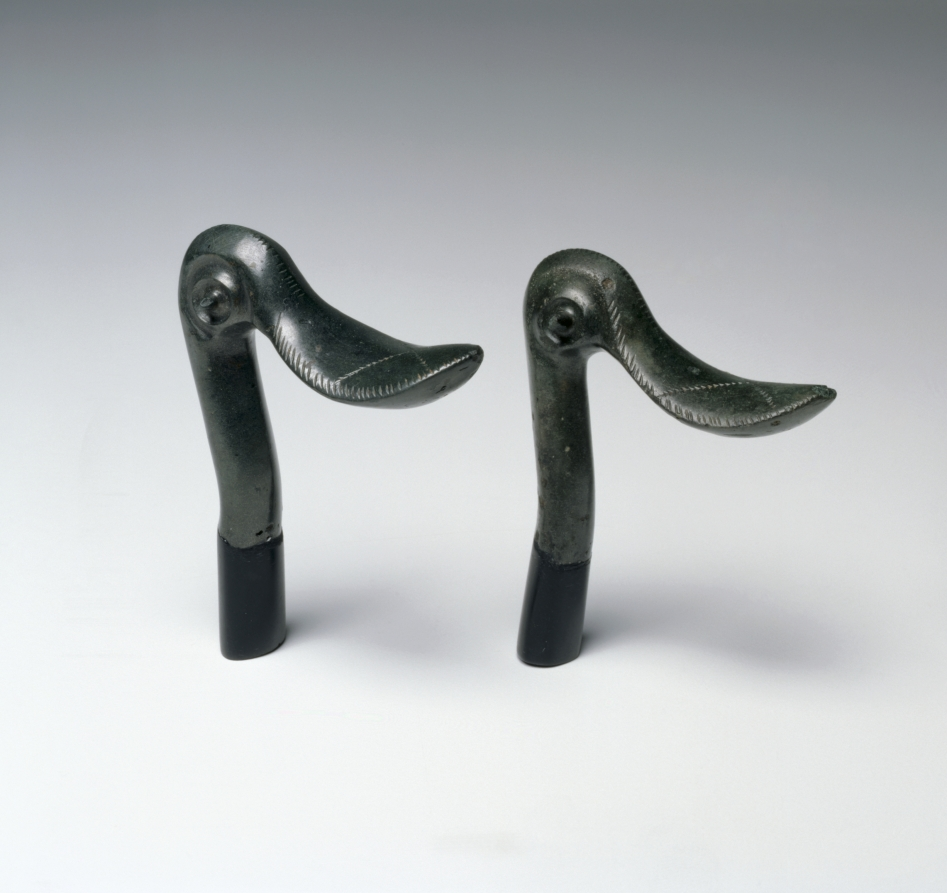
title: Duck Head Finial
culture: possibly Hungary, Bronze Age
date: c. 1400–1300 BCE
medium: bronze, cast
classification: Sculpture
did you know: A decorative object, this duck head finial likely topped a piece of furniture.